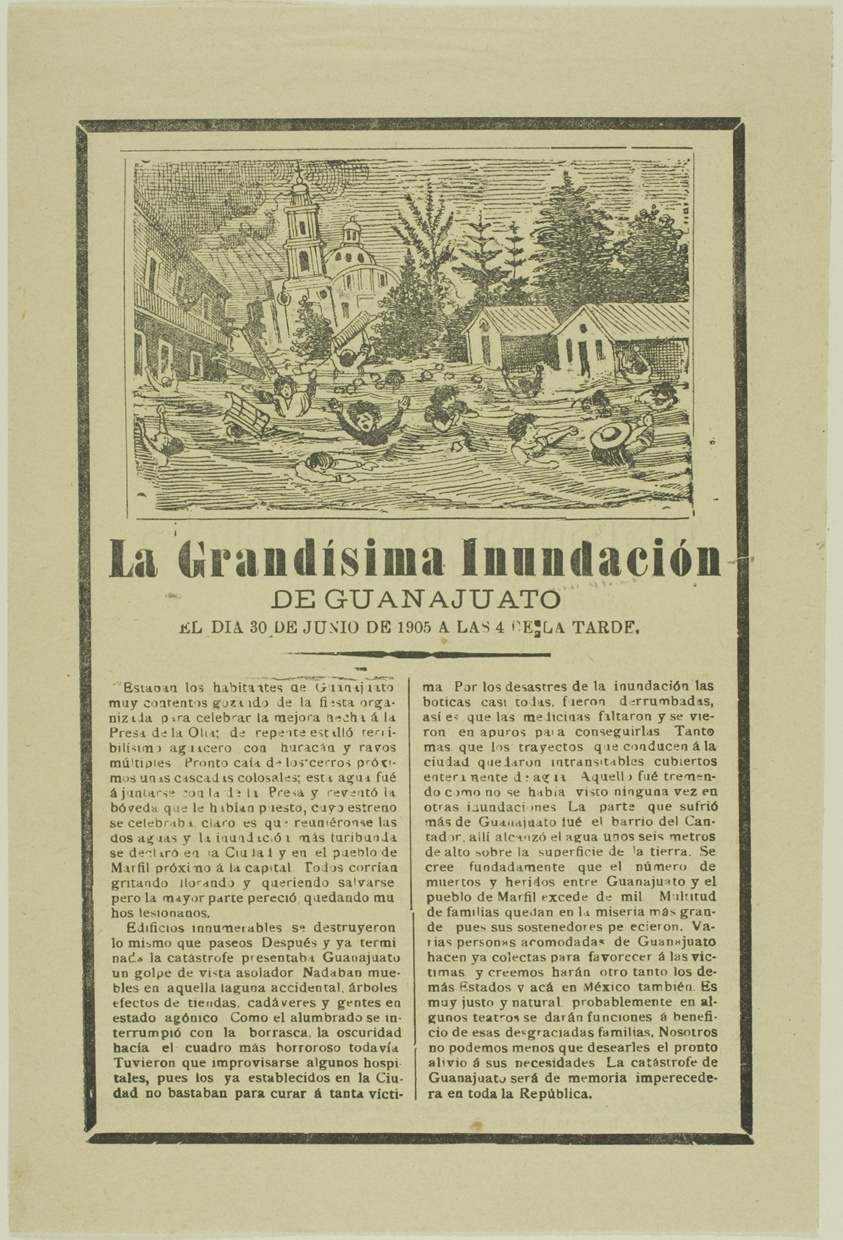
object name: Print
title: The Great Flood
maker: José Guadalupe Posada (Mexican, 1852-1913)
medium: Relief etching on paper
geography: Mexico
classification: relief etching; print; prints and drawing